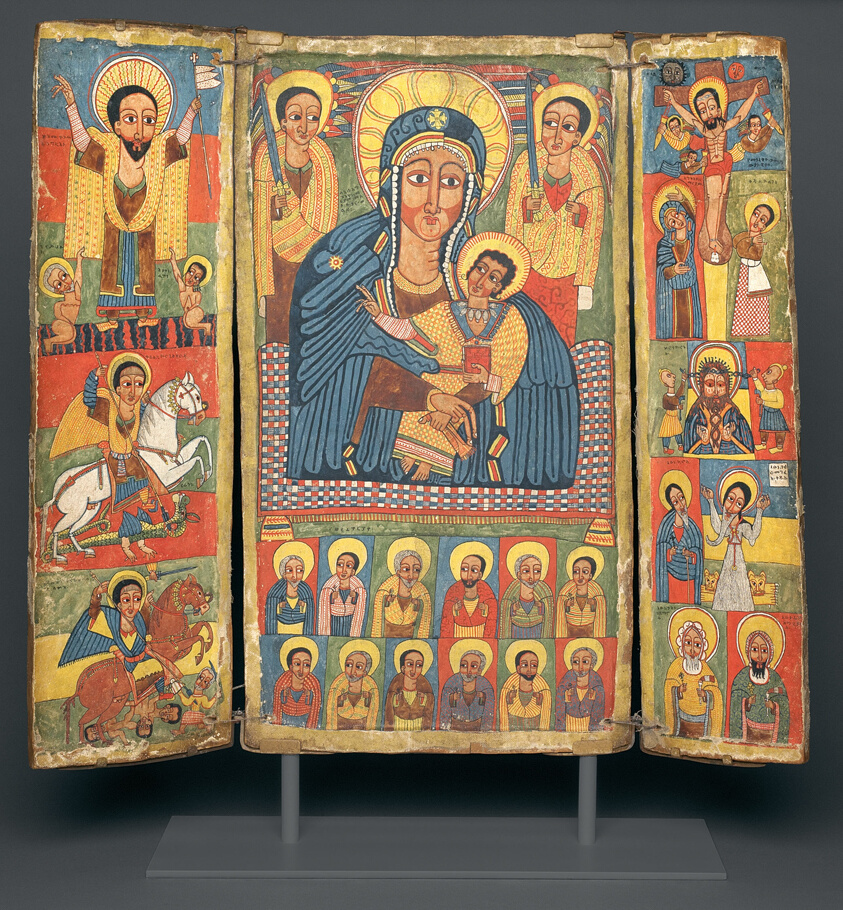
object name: Icon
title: Triptych Icon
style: gondar, Arts of Africa, ethiopia, african Art, Eastern and Southern Africa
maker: Central Ethiopia; Eastern and Southern Africa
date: Late 17th century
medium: Tempera on linen, mounted on wood and bound with cord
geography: Ethiopia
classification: triptych; arts of Africa; african art; ritual objects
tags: religion, biblical, Virgin and child/Madonna and child, Jesus, saints, procession, ritual, worship, Christian subjects